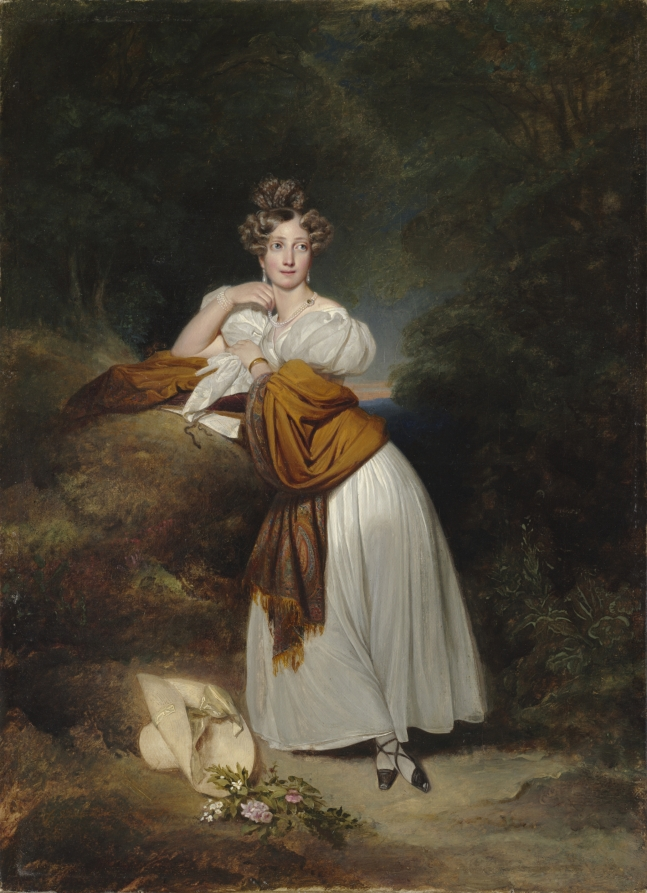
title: Sophie Guillemette, Grand Duchess of Baden (1801-1865)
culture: Germany, 19th century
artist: Franz Xaver Winterhalter (German, 1805–1873)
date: 1831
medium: oil on fabric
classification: Painting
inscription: Signed lower left: Fr. Winterhalter f 1831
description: Sophie Guillemette (1801-1865), daughter of Gustavus IV Adolphus of Sweden, was the wife of Grand Duke Leopold of Baden. Winterhalter was her drawing instructor and made several portraits of both the duke and the duchess before leaving for London to become the most celebrated portrait painter of his time.